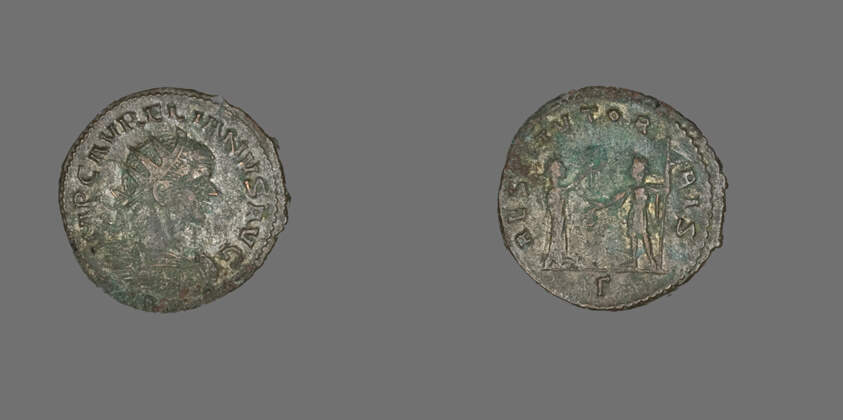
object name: Coin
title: Antoninianus (Coin) Portraying Emperor Aurelian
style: roman (ancient, style or period), ancient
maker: Roman; minted in Cyzicus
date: 270-275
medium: Billon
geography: Roman Empire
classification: coin; ancient art